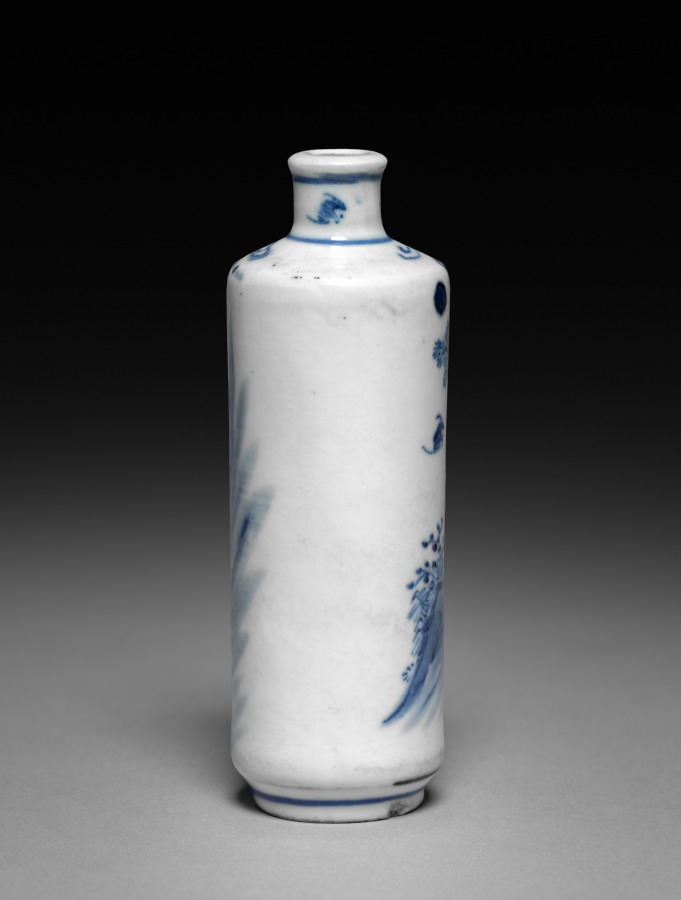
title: Blue and White Snuff Bottle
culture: China, Qing dynasty (1644-1911), Kangxi reign (1661-1722)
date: 1661–1722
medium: porcelain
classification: Ceramic